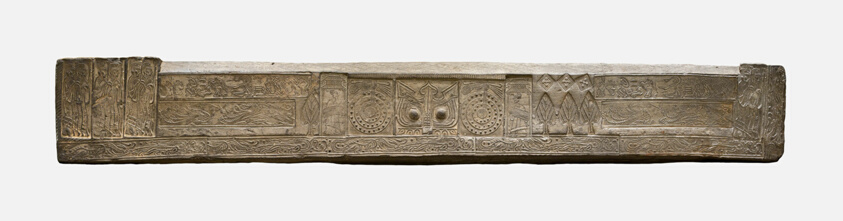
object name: Architectural fragment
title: Hollow Brick (probably Lintel) from Tomb Chamber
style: Chinese (culture or style)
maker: China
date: Western Han dynasty (206 B.C.–A.D. 9), 1st century B.C.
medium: Gray earthenware with impressed and carved decoration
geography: China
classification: earthenware; ceramics; architectural fragment; asian art